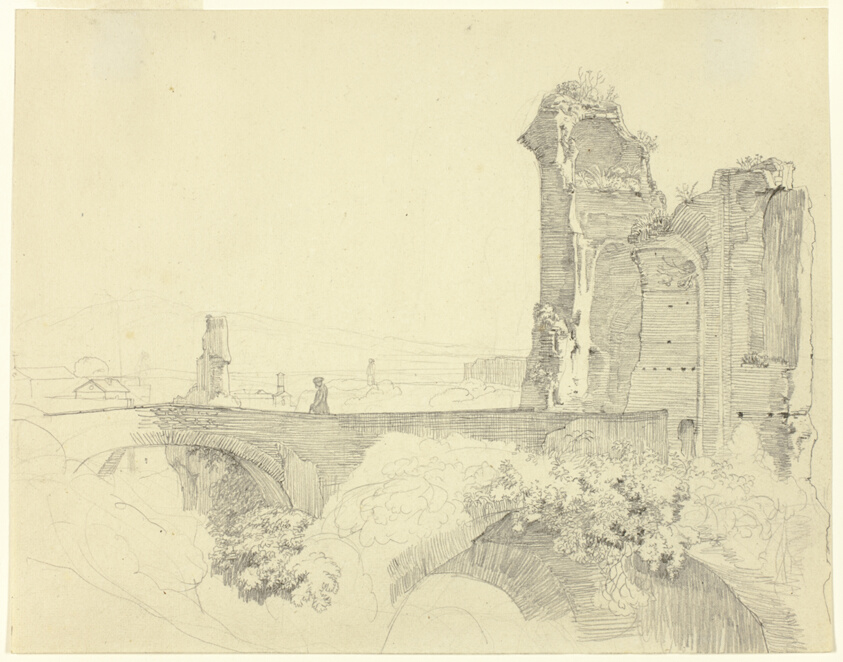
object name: Drawing and Watercolor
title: Bridge and Ruined Tower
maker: Johann Christoph Erhard (German, 1795-1822)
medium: Graphite on cream wove paper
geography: Germany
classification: graphite; drawings (visual works); prints and drawing